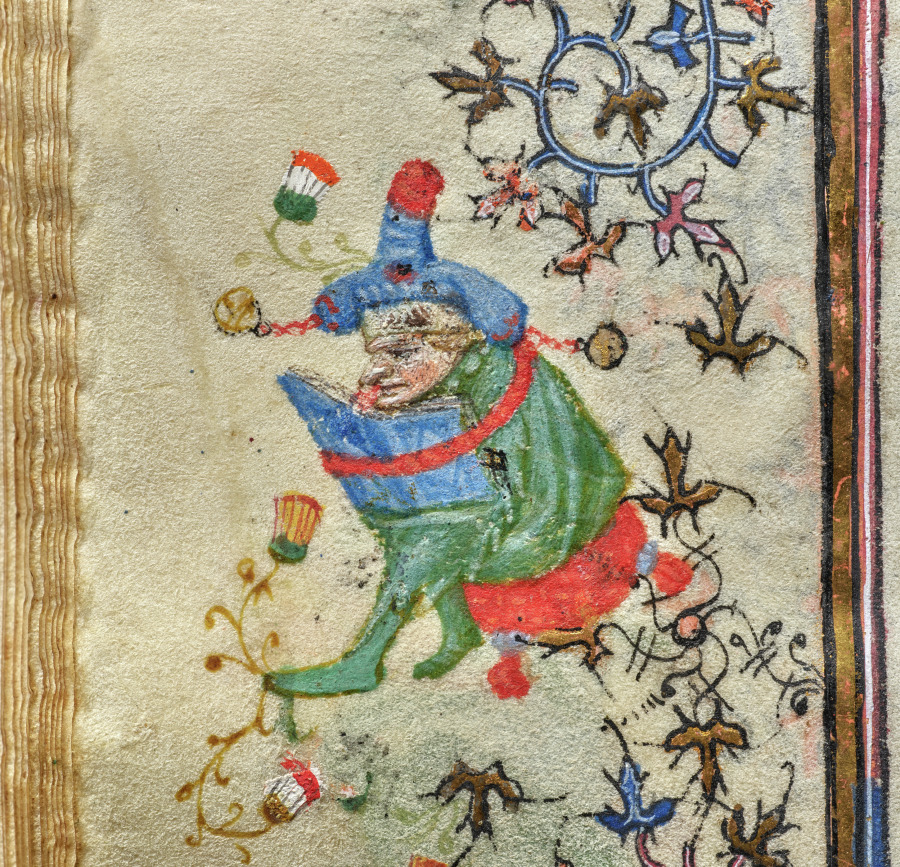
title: Hours of Charles the Noble, King of Navarre (1361-1425): fol. 59v, Text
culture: France, Paris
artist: Master of the Brussels Initials and Associates (French)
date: c. 1405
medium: ink, tempera, and gold on vellum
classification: Bound Volume